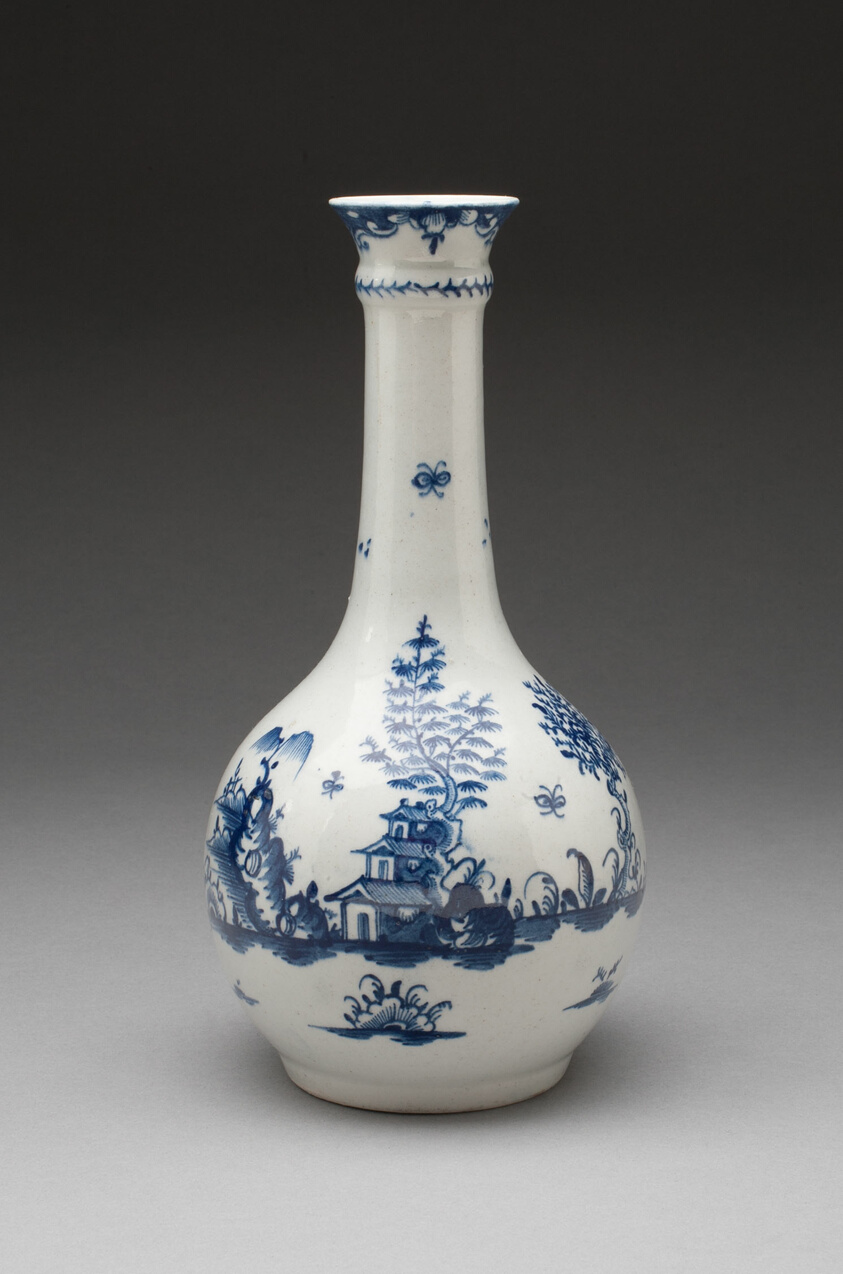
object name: Ceramics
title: Juglet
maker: Worcester Porcelain Factory (Warmstry House Period, 1751–1783); Worcester, England, founded 1751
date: c. 1770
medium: Soft-paste porcelain, underglaze blue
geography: Worcester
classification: porcelain; european decorative arts; ceramics